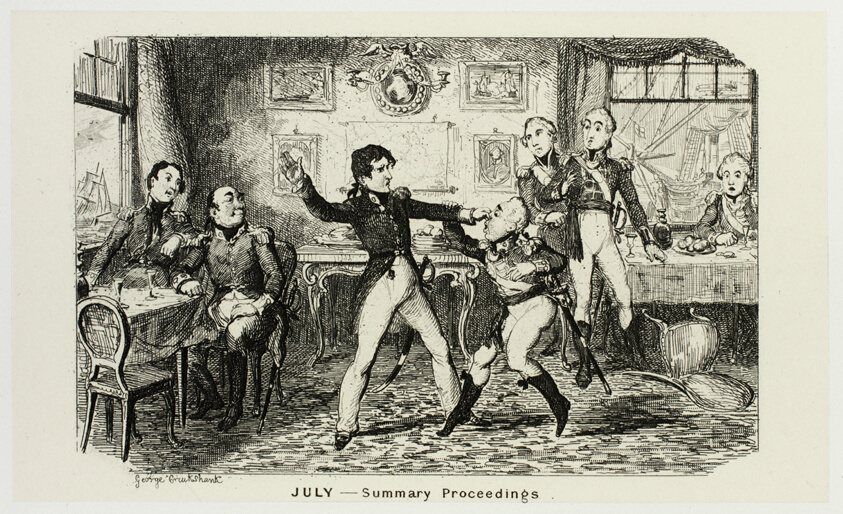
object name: Print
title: July - Summary Proceedings from George Cruikshank's Steel Etchings to The Comic Almanacks: 1835-1853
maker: George Cruikshank (English, 1792-1878); published by Pickering & Chatto (English, 19th century)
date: 1839, printed c. 1880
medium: Steel etching in black on cream India paper, laid down on off-white card (chine collé)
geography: England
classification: etching; paper; steel; print; prints and drawing